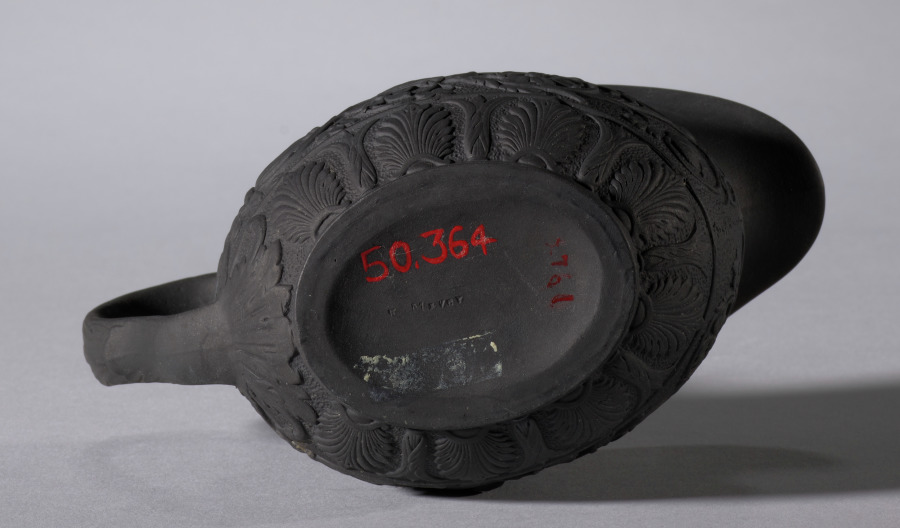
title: Creamer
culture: England, 19th century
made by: Elijah Mayer (British, c. 1770–1805)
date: c. 1810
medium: black basalt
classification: Ceramic